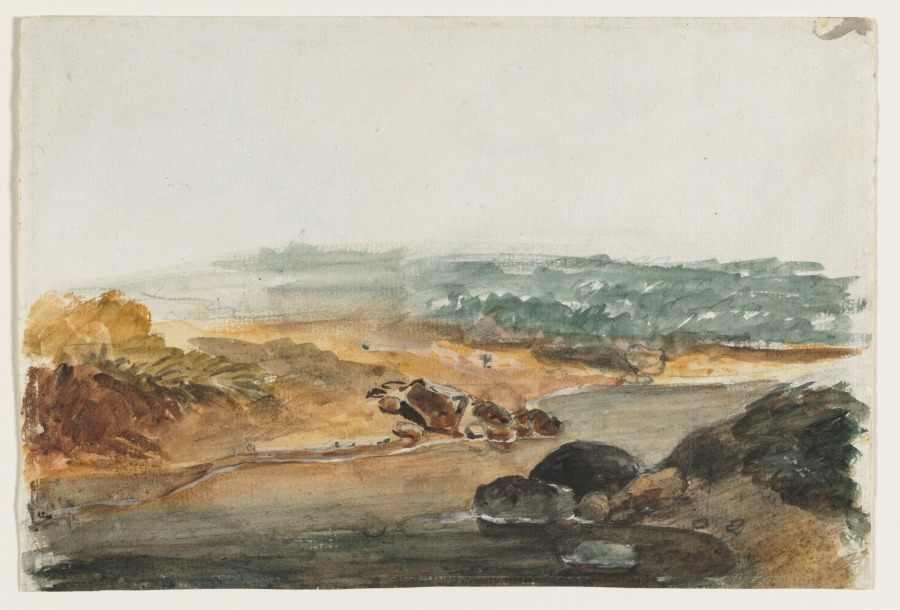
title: Landscape (recto); Studies of Animals (verso)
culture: France, 19th century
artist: Antoine-Louis Barye (French, 1796–1875)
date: c. 1823–75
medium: watercolor with white gouache, and graphite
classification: Drawing